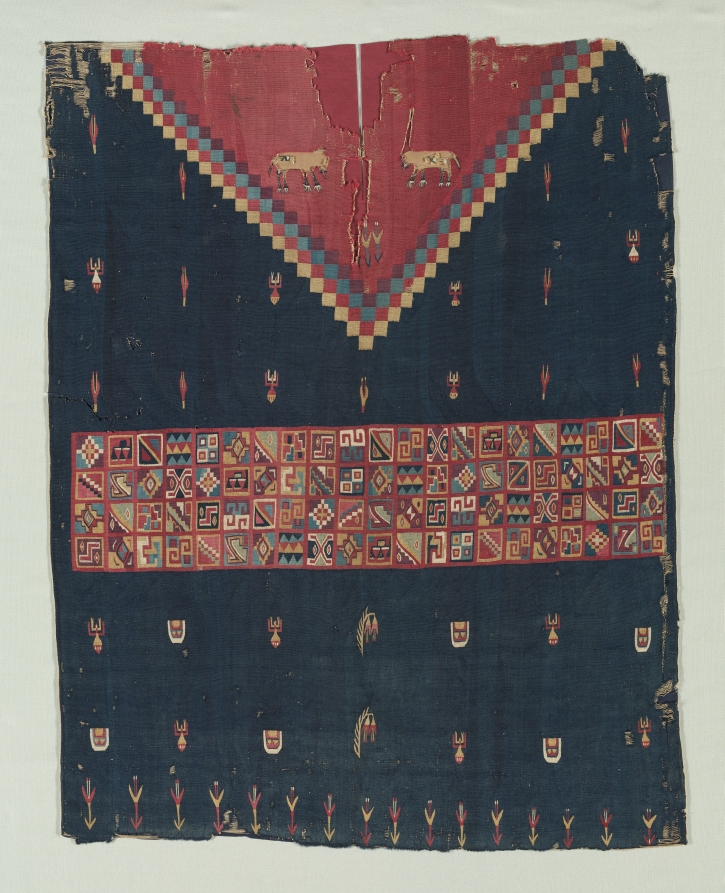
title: Half Tunic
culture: Peru, South Coast, Inca Culture, Colonial Period, 16th century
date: 16th century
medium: interlocked tapestry; cotton and wool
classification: Textile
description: The "t'oqapu" waistband and the deep V-yoke were standard decorations of Inca tunics. However, the fantastic animals represented in the yoke and the floral motifs in the main field identify this tunic as dating after the Spanish Conquest in 1532.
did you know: In Inca times, only the ruler and select nobles had the privilege of wearing t'oqapu tunics.